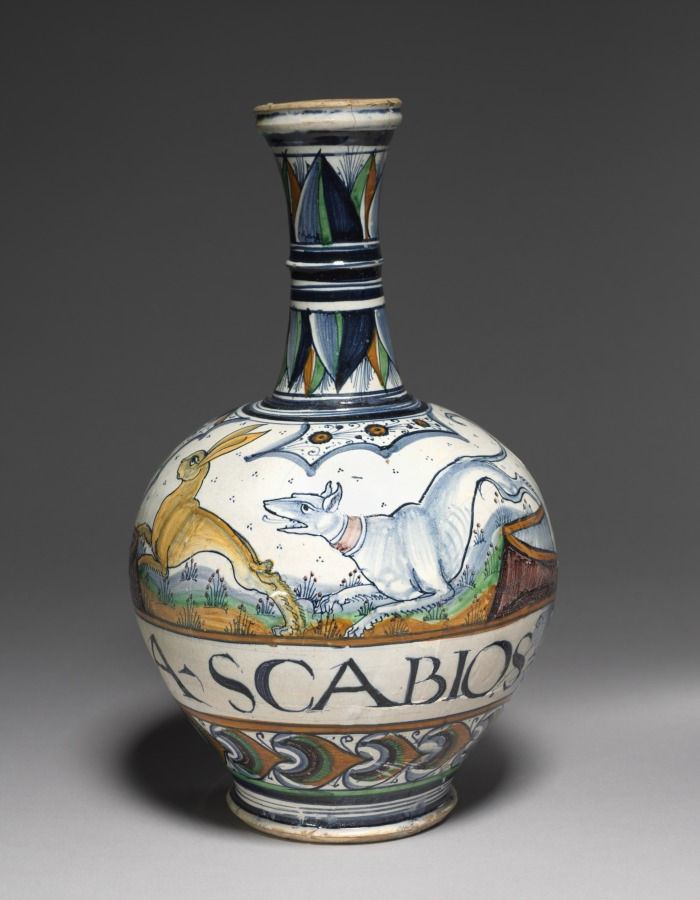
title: Pair of Pharmacy Bottles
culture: Italy, Papal States, Faenza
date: c. 1500–1510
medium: tin-glazed earthenware (maiolica)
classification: Ceramic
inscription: Written in lower ribbon band of 1943.52.1: A. SCABIOS. Written in lower ribbon band of 1943.52.2: A. CAPILLV.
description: The inscriptions on these two pharmacy bottles suggest that they held medicinal and domestic remedies. One bottle reads SCABIOS, or “scabious water,” which may refer to a teasel root compound that was used to clean and decontaminate velvet. Inscribed on the other bottle is the word CAPILLV, which was a liquid extracted from a fern-like plant commonly referred to as “maiden’s hair water.”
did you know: During the Renaissance, aristocrats tested the speed and agility of their greyhounds in a sport called “hare coursing.”